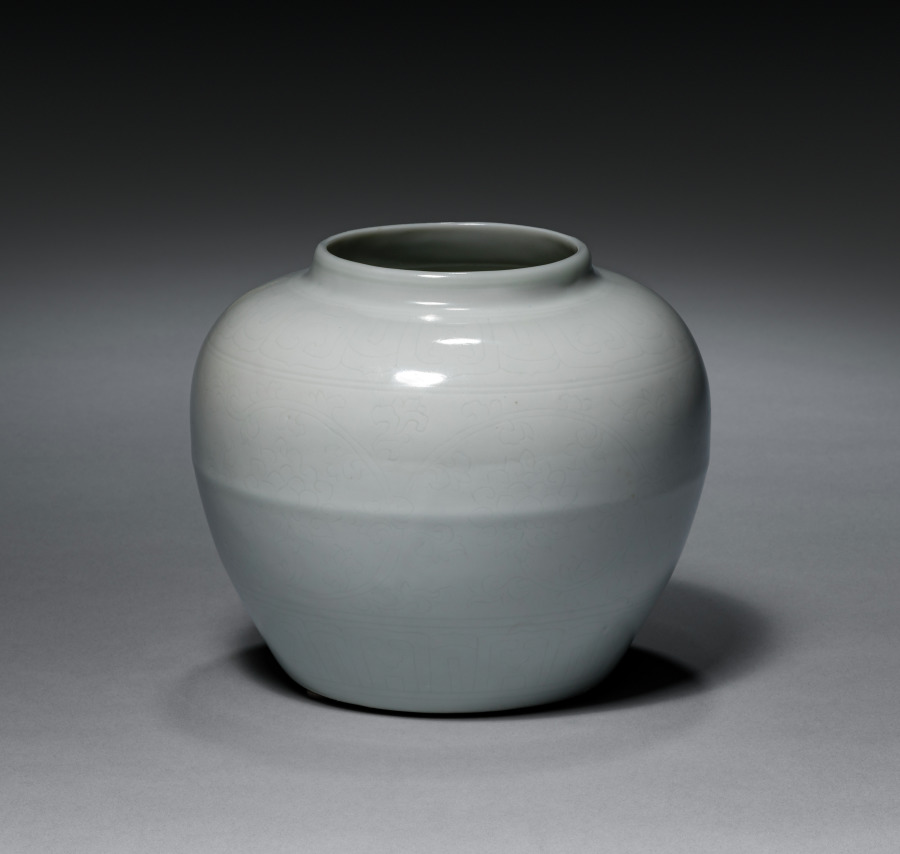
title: White-Glazed Jar with Hidden Design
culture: China, Jiangxi province, Jingdezhen kilns, Ming dynasty (1368-1644)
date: 1500s–1600s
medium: Porcelain with sweet-white (tianbai; 甜白) glaze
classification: Ceramic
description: White was a ritual color used in Buddhist ceremonies, as well as the color of mourning. This jar is made of two molded halves that were joined where the vessel’s middle section shows a raised line. It is covered by a silky white glaze called “sweet-white” (tianbai; 甜白). A “hidden design” (anhua; 暗花) of floral scrolls on the shoulder and stylized petals around the base shine through the glaze. The jar may have been used as a planter, a vase for flowers, or it may have held incense sticks on a home altar.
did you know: Tianbai, or sweet-white glaze, was developed to accommodate the Yongle emperor’s (reigned 1403–24) preference for white ceramics.